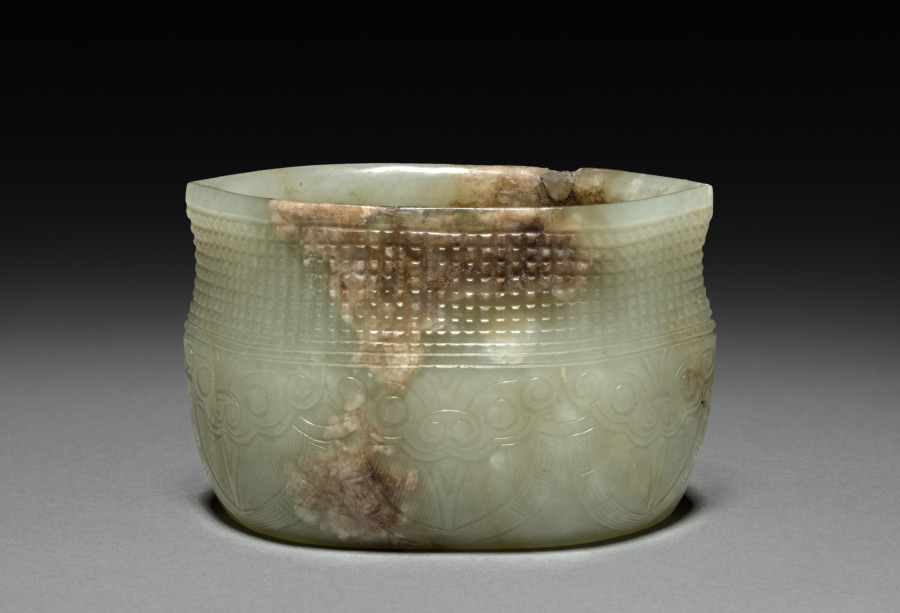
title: Cup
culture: China, Song dynasty (960-1279)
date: 960– 1279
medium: jade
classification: Jade